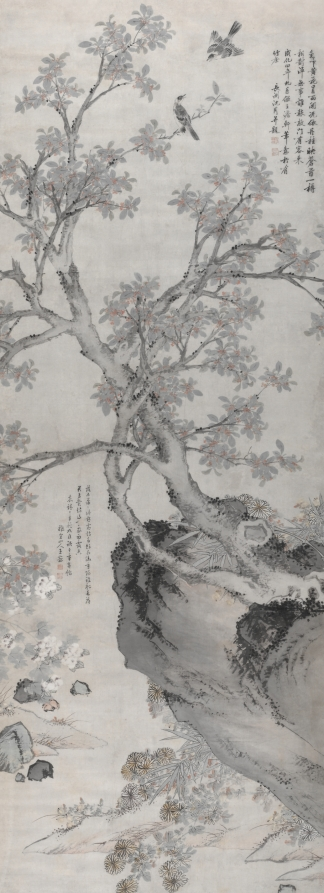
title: Yellow Chrysanthemums and Red Osmanthus in the Style of Wang Yuan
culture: China, Ming dynasty (1368–1644)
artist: Shen Zhou (Chinese, 1427–1509)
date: 1468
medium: hanging scroll, ink on paper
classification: Painting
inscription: Artist's inscription, signature, and 2 seals at upper right: Beneath the fence yellow [chrysanthemum] flowers brave the rain to blossom;/ Still others lean on the red osmanthus tree and dazzle the deep green moss./ With a goblet [of wine] I face them, entirely without concern;/ Who will answer the knocking at the gate where a guest has arrived? In the ninth month of the fourth year of the Chenghua era [1468], I followed the brush-conception of Wang Danxuan 王澹軒 [Wang Yuan 王淵] at the Youzhuzhuang 有竹庄 [House with Bamboo]. Inscribed and [painted] by Shen Zhou 沈周 of Changzhou 長洲. [seals] Shitian 石田; Shen shi Qinan 沈氏启南. trans. HR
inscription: 1 additional inscription, dated 1523, and 2 seals of Wang Chong 王寵 (1494-1533).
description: Shen Zhou, a native from Suzhou, was descended from a prominent land-owning family with strong ties to literati culture. Because Shen Zhou never entered government service, he had ample opportunity to cultivate the arts of painting, poetry, and calligraphy. Chrysanthemums and red osmanthus both bloom in autumn. The deep orange osmanthus flowers emanate a characteristically sweet fragrance. According to his inscription on the painting, Shen Zhou sought to imitate the style of the Yuan dynasty (1271–1368) painter Wang Yuan. His color-filled brushstrokes and washes, however, anticipate the flower painting style of Yun Shouping, whose Peonies are also in the Cleveland Museum of Art collection, https://www.clevelandart.org/art/1967.192. The sheer size and complex composition of this scroll are impressive.